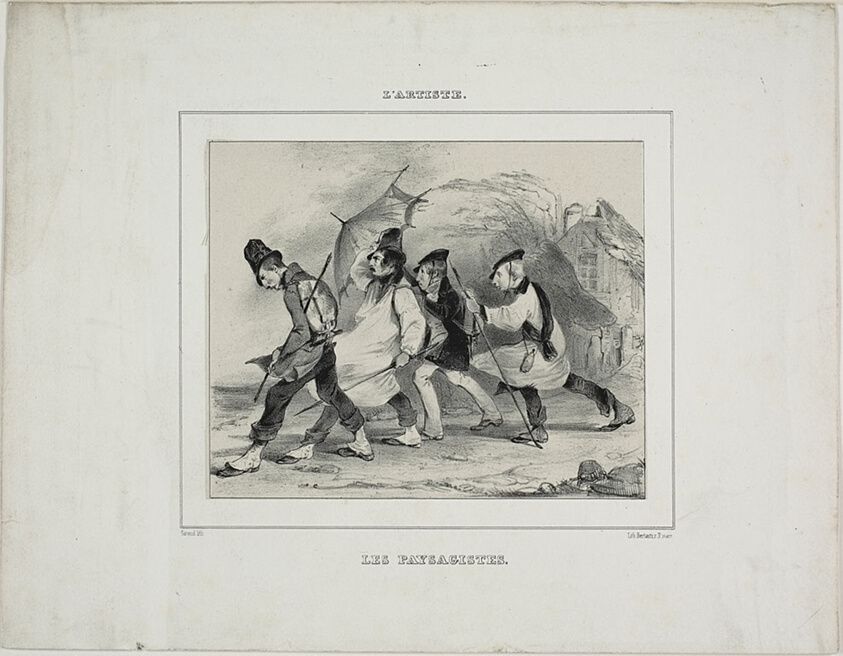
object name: Print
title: The Landscape Painters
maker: Pierre François Eugène Giraud (French, 1806-1891)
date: 1833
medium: Lithograph on cream China paper, laid down on ivory wove paper (chine collé)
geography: France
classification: lithograph; print; prints and drawing